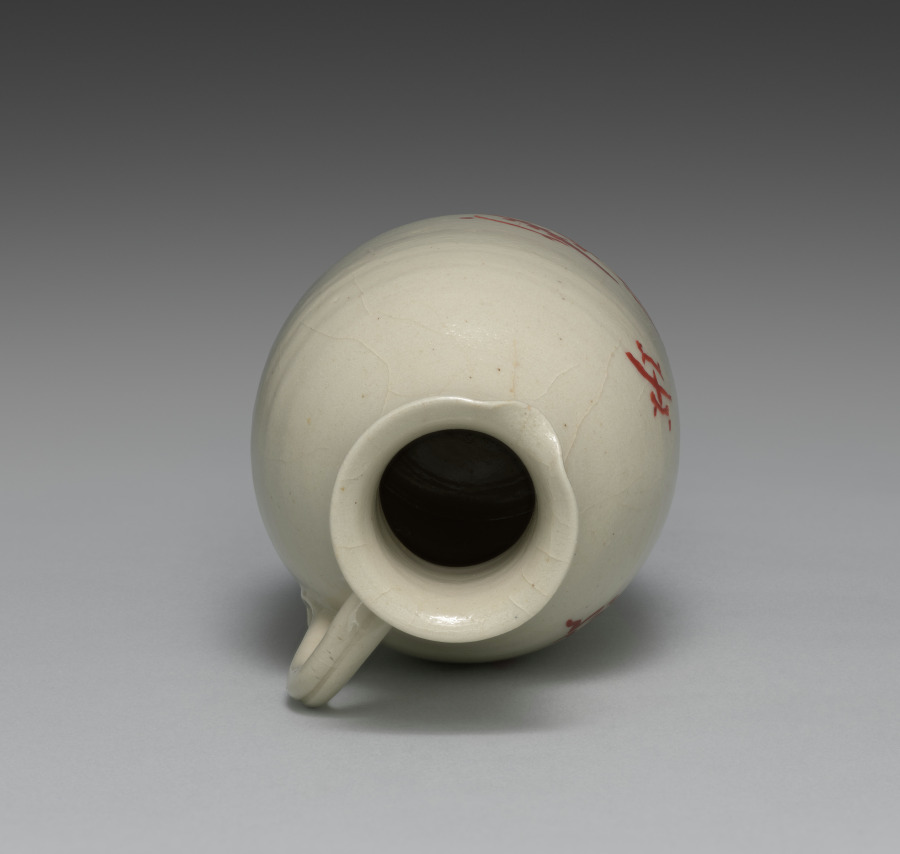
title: Tortoises Sake Pourer from Sake Pourers with Crane and Tortoises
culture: Japan, Meiji period (1868–1912)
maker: Seifū Yohei III (Japanese, 1851–1914)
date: 1893–1914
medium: One of a pair of sake flasks; porcelain with overglaze color enamel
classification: Ceramic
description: This flask has stencil-like paintings of three turtles—a young one with its parents—while the other in this pair has a crane with a leg raised. Cranes and turtles are well-recognized symbols of longevity in East Asia, with the turtle said to live for ten thousand years and the crane for one thousand. Each flask also has a poem on the back, one in Chinese and the other in Japanese. The latter, which appears on the turtle flask, reads kame iwaku kamiyo wa, ore no wakaki toki. The seventeen syllable poem begins with “turtle” and ends with “when I was young.” It can be translated as, “the turtle said the world of the gods began when I was young.”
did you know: This pair of seemingly humble sake pourers celebrate longevity and delight in a literary tradition that embraces multiple forms of poetic expression.